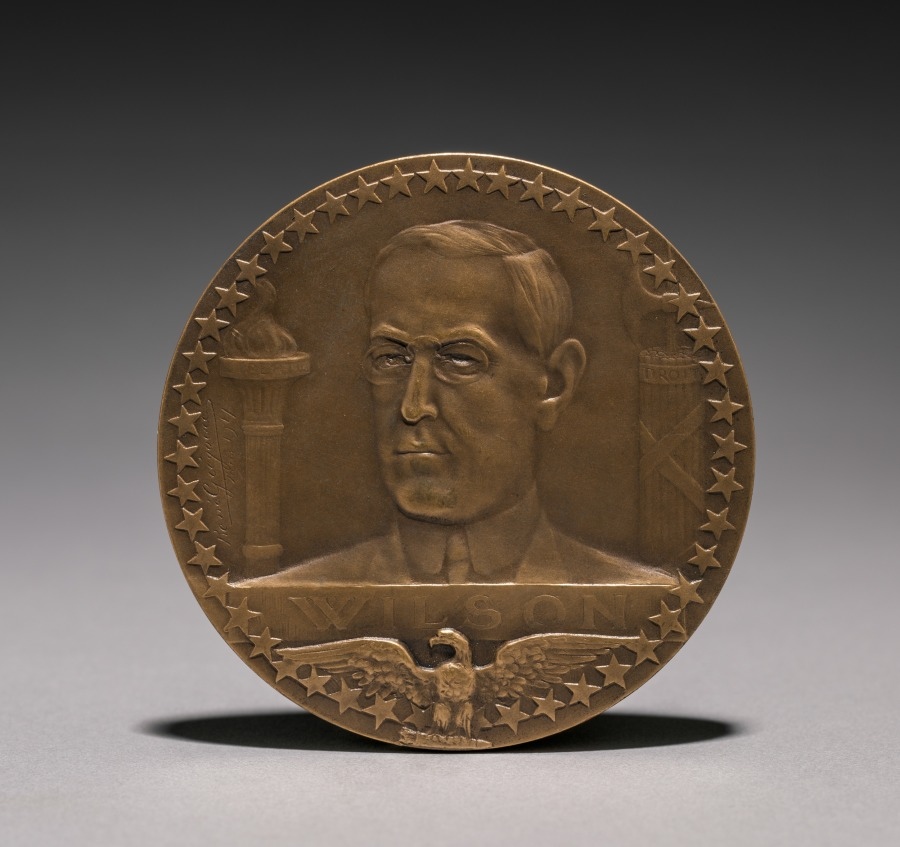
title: Medal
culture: France, 20th century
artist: René Grégoire (French, 1871–1945)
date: 1914–1918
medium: bronze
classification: Metalwork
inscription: "Wilson."